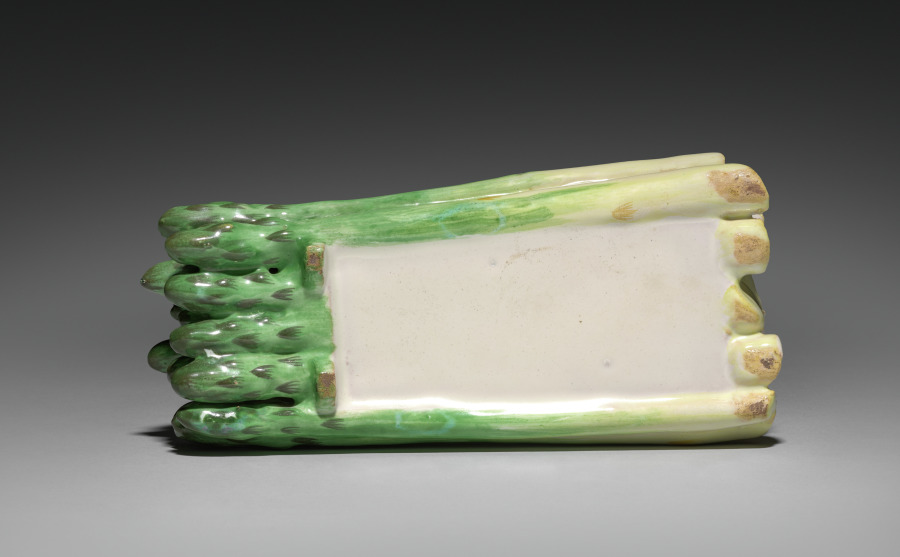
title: Box in the Form of Asparagus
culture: France, Sceaux(?), 18th century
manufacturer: probably by Sceaux Factory (French, active 1748–66)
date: c. 1765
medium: tin-glazed earthenware (faience) with enamel decoration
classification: Ceramic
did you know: Placed upon the dinner table, this container's lid might be lifted to reveal steaming asparagus. Imagine a wealthy 18th-century dining room with flickering candles, whimsical sculptures, and dishes like this decorating the table.